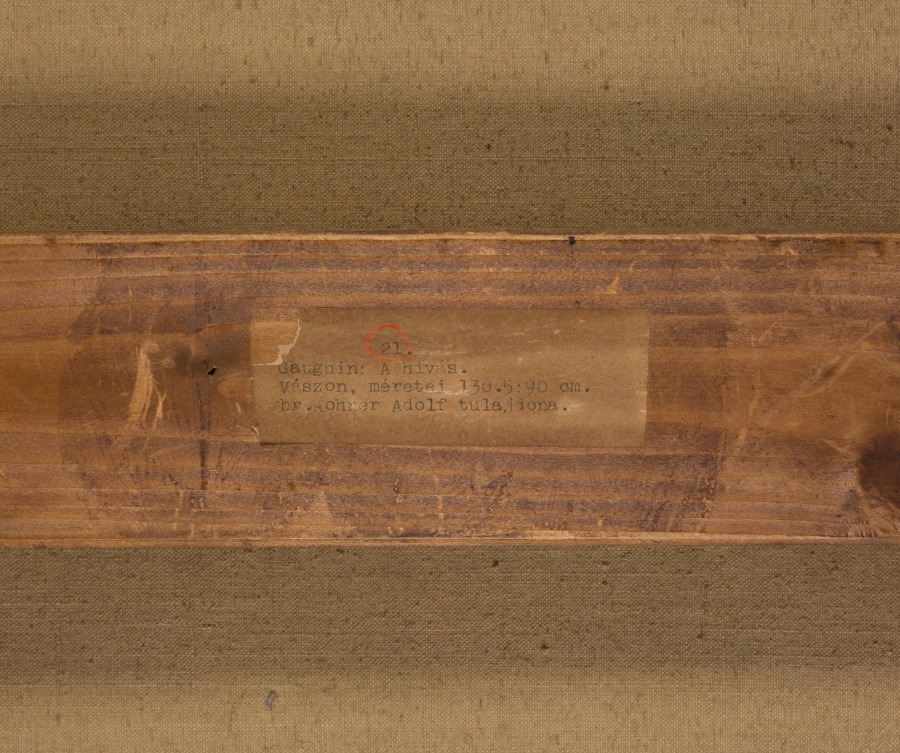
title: The Call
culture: France, late 19th-early 20th Century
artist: Paul Gauguin (French, 1848–1903)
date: 1902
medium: oil on fabric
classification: Painting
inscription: Signed lower right: P. Gauguin / 1902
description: Painted on a remote island in Polynesia a year before the artist's death, The Call belongs to a series of late works that explore the mysteries of life and death. Two women stand with bare feet, as if on sacred ground. One woman gestures to someone outside the picture, perhaps responding to a "call" from fate or destiny. Gauguin realized his ambition of painting from memory and the imagination through such mysterious, dreamlike images.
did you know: Although known as one of the founders of modern art, Gauguin found inspiration in ancient Greek, Roman, and Egyptian art. The woman with the pointing finger on the right side of this painting was taken from a figure on the Parthenon frieze.